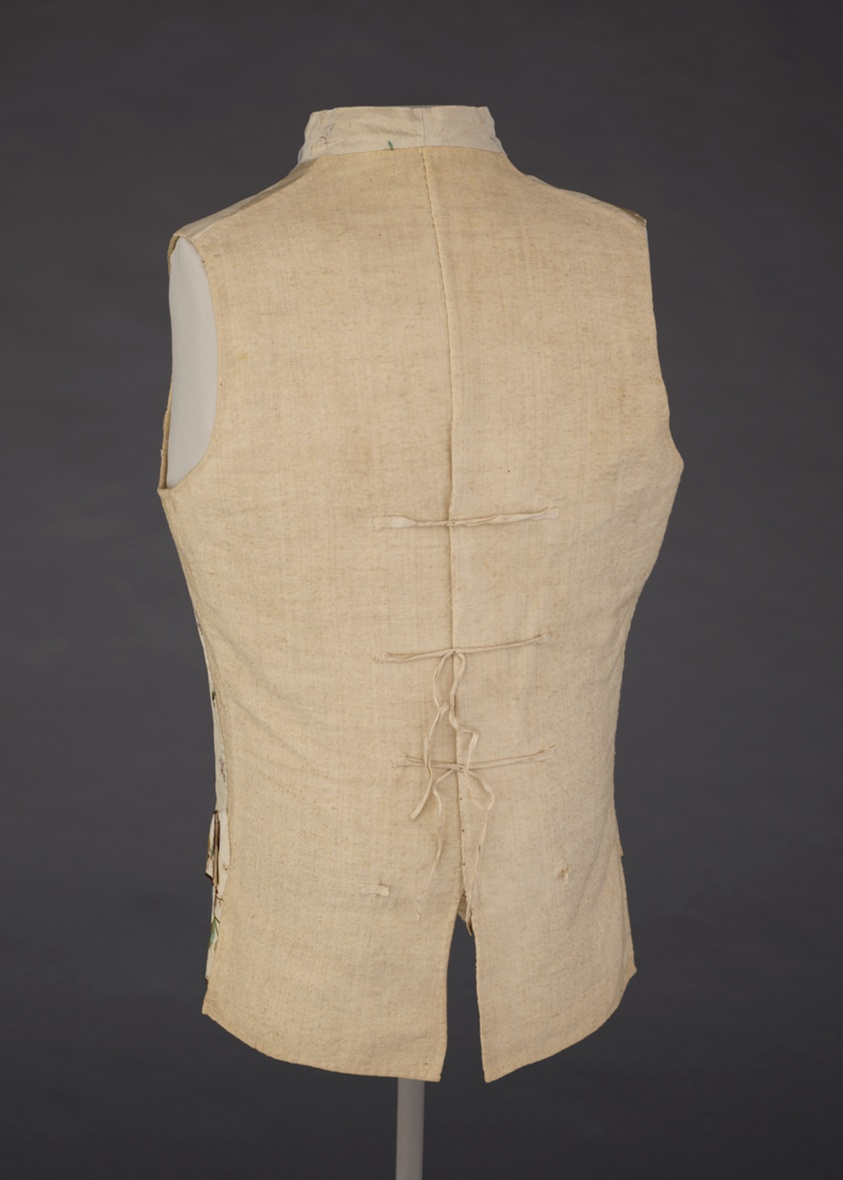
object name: Costume and Accessories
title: Man's Waistcoat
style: 18th Century, Rococo, Neoclassicism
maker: Possibly Lyon, France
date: Embroidered 1780s; altered 1795–1805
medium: Front: Silk, satin-weave foundation, embroidered with silk thread in satin, steam and buttonhole stitches and French knots; embroidered fabric covered buttons; silk, twill weave lining; back: linen, plain weave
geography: France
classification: waistcoat (garment); costume; needlework (visual works); dress (garment); clothing; textile; costume - embroidery; garment; costume - needlework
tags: flowers, roses, fashion, floral, floral motifs